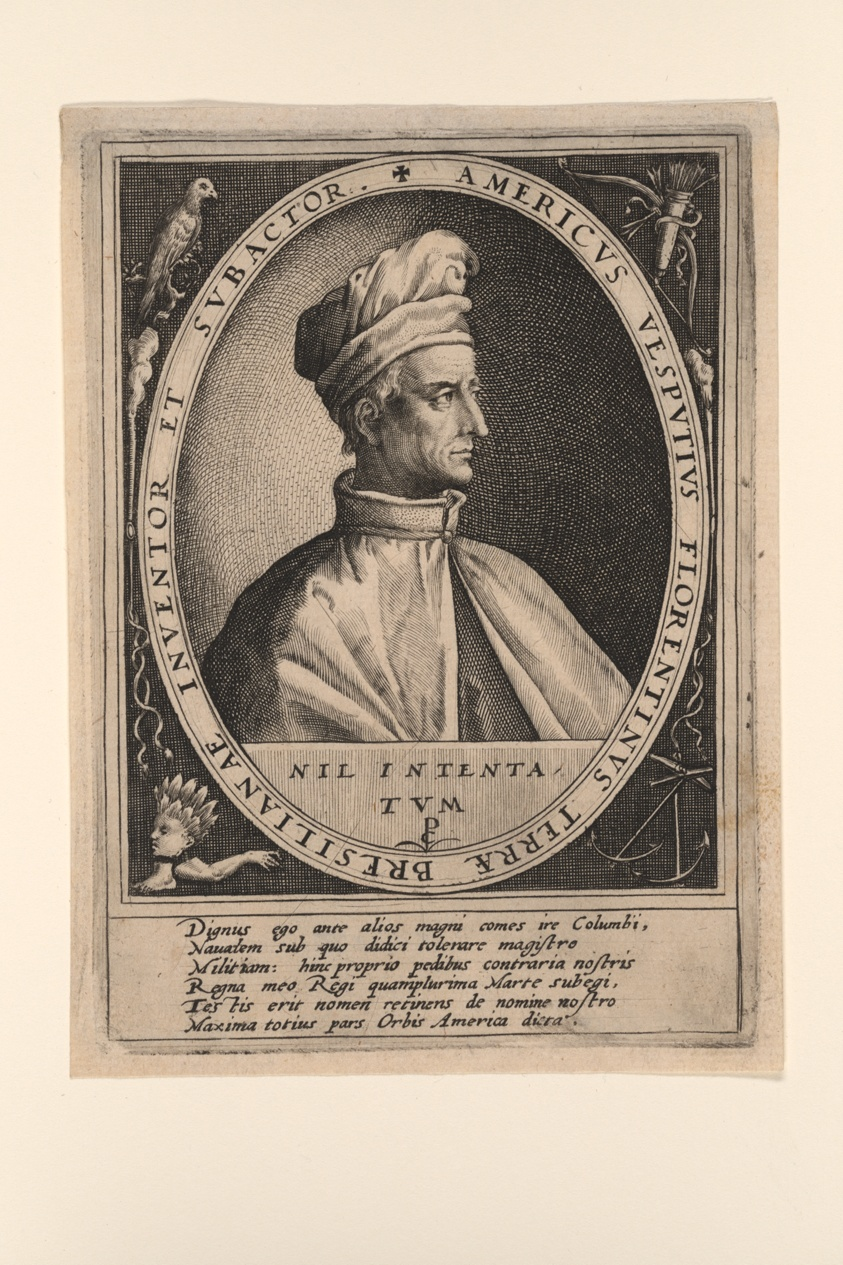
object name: Print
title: Amerigo Vespucci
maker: Crispijn van de Passe I; Dutch, c. 1565–1637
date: 1590/1600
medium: Engraving on paper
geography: Netherlands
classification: engraving; paper; print; prints and drawing